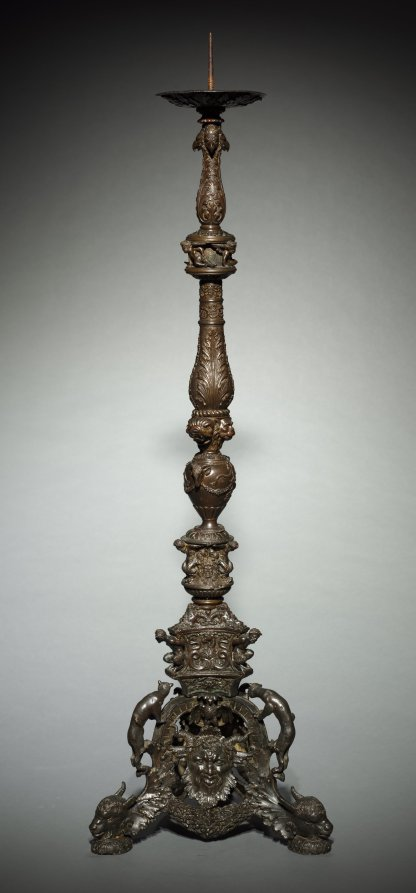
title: Paschal Candlestick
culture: Northern Italy, possibly Padua, 16th century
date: c. 1525–1550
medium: bronze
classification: Sculpture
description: In Roman Catholic practice, a large candlestick holds the Paschal Candle, blessed and lit for the first time on Easter eve, then used on significant occasions throughout the year. Despite its religious function, the decorations here are entirely secular-ranging from panthers and bound satyrs to the heads of raptors and goats. These elements derive from ancient Roman sculpture and were especially popular among intellectuals in northern Italy, who were actively exploring connections among pagan traditions, ancient philosophy, and Christianity.